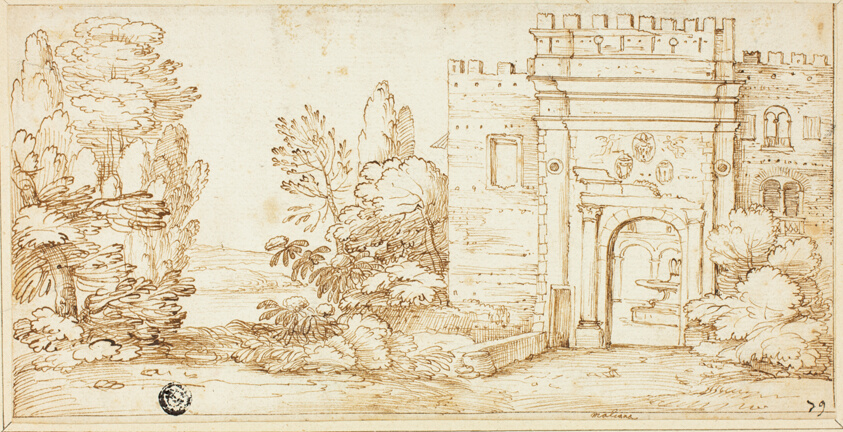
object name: Drawing and Watercolor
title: View of La Magliana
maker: Giovanni Francesco Grimaldi (Italian, 1606-1680)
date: c. 1670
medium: Pen and brown ink, over traces of graphite, on ivory laid paper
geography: Italy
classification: pen and ink drawings; drawings (visual works); prints and drawing